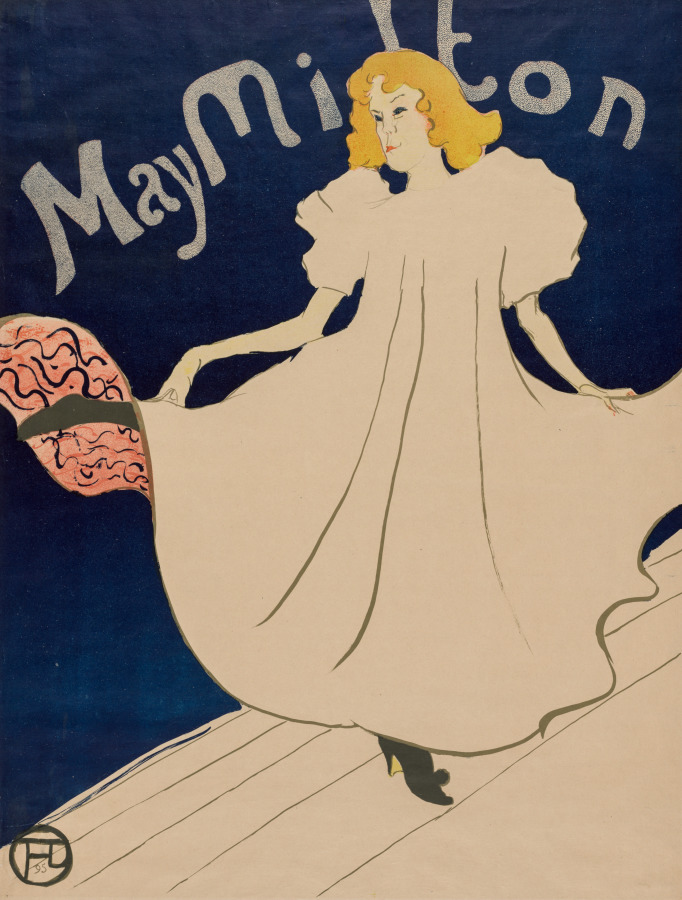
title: May Milton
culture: France, 19th century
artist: Henri de Toulouse-Lautrec (French, 1864–1901)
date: 1895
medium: color lithograph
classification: Print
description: Posters grew in popularity after 1881, when many restrictions on their placement were lifted and it became unlawful to remove or destroy them. The first exhibition of posters took place in 1884, and they were soon accepted as a legitimate art form. Lautrec, a gifted draftsman, excelled at designing arresting lithographs. May Milton, one of his boldest compositions, illustrates Lautrec's innovative style based on a dynamic pattern of flat, simplified, brightly colored shapes and dramatic silhouettes. Lautrec, an astute observer of character and physical features, captured the life of a decadent era in his radically concise, vigorous representations. May Milton was an English dancer who appeared at the Moulin Rouge, one of Paris's most popular café-concerts. This poster was made to advertise her tour of the United States.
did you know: May Milton was the romantic partner of May Belfort, another performer whom Toulouse-Lautrec frequently depicted.